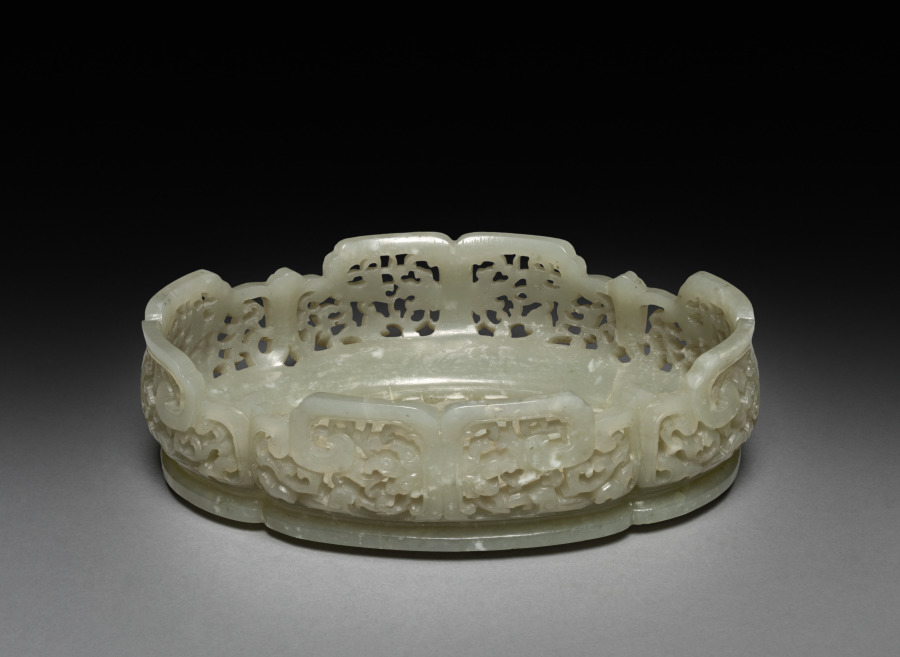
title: Oval Stand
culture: China, Qing dynasty (1644–1911), Qianlong reign (1736–95)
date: 1700s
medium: jade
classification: Jade